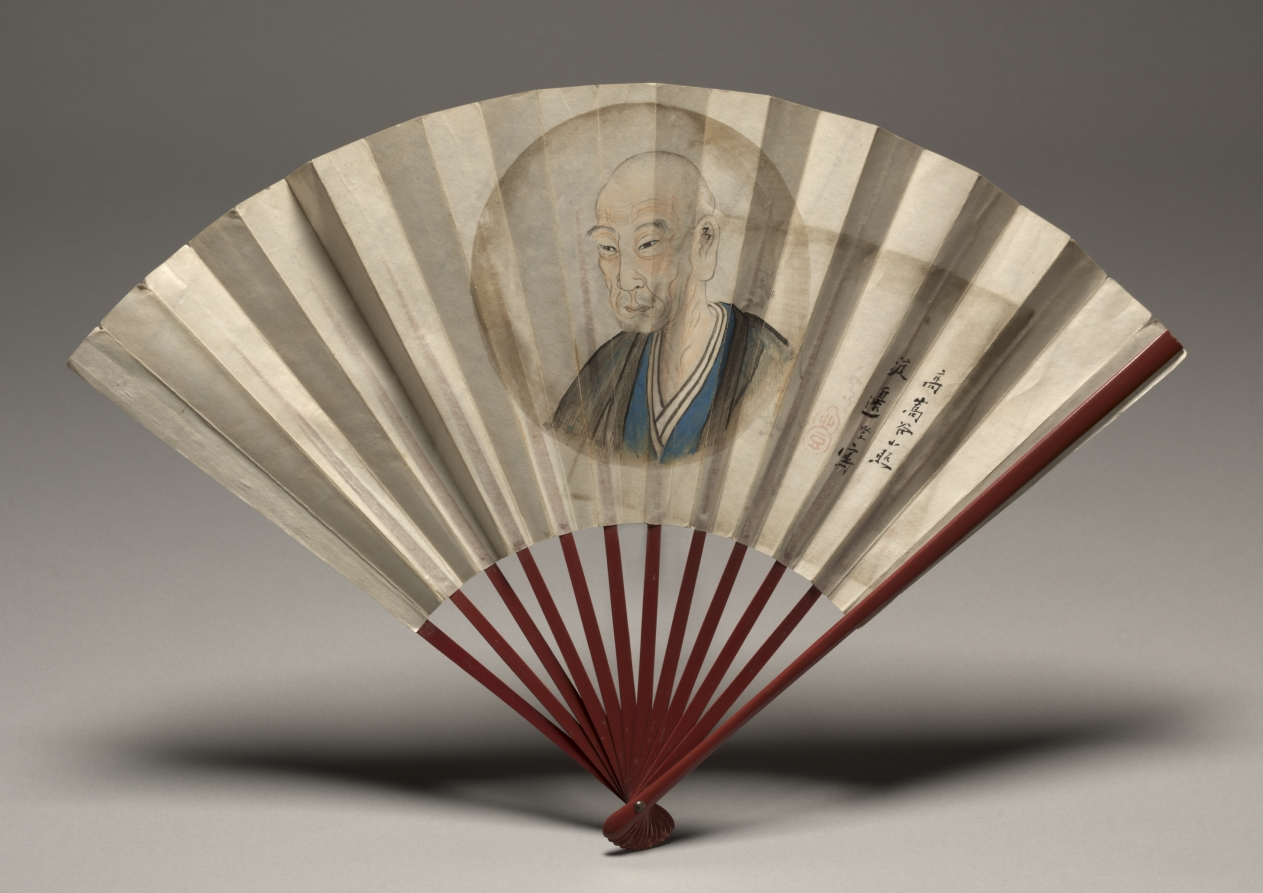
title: Portrait of Kō Sūkoku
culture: Japan, Edo period (1615–1868)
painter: Watanabe Kazan (Japanese, 1793–1841)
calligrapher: Tani Buncho (Japanese, 1763–1840)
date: possibly 1817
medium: Fan, wood with ink, color, gold, and silver on paper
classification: Painting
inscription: The grave is readied / and the sake warmed. / Oh, the cold!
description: Master of portraiture Watanabe Kazan’s memorial fan painting of the artist Kō Sūkoku (1730–1804) features a variant on one of the deceased’s poems by painter Tani Bunchō on the reverse. The short, unorthodox or comic poem (haikai) reads: The grave is readied / and the sake warmed. / Oh, the cold! Kazan was a disciple of Tani Bunchō, one of the most prominent painters of his day. The two first met in 1817, the year of the 13th anniversary of Kō Sūkoku’s death. In Japanese Buddhist practice, the 13th death anniversary requires special memorial services, so it has been speculated that the two collaborated on the fan at that time. Many painters and print designers of the Edo period socialized with one another through poetry circles where linked verse poems (renga) and haikai were composed.